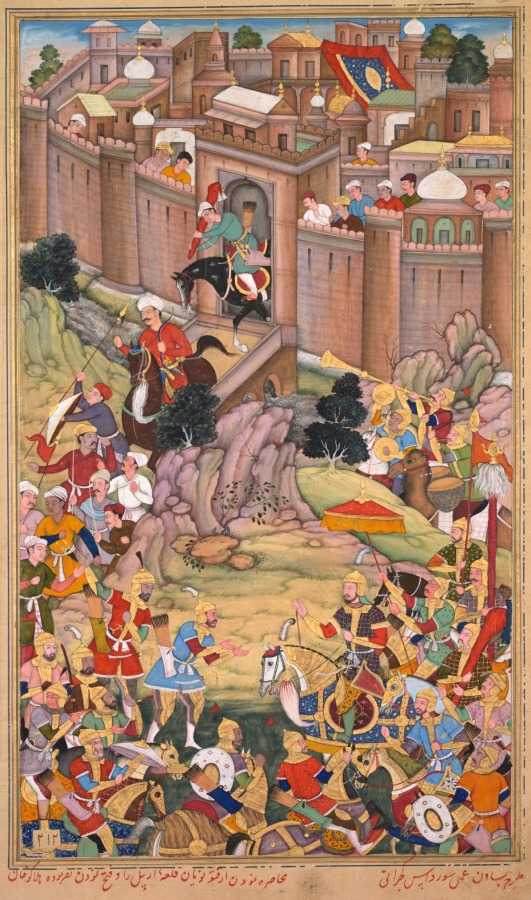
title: The siege of Arbela in the era of Hulagu Khan, from a Chingiz-nama (Book of Chingiz Khan) of the Jami al-tavarikh (Compendium of Chronicles) of Rashid al-Din (Persian, 1247–1318)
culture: Mughal India, court of Akbar (reigned 1556–1605)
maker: Basavana (Indian, active c. 1560–1600)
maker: and Sur Das Gujarati (Indian, active 16th century)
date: c. 1596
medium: Gum tempera, ink, and gold on paper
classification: Painting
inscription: recto lower left: [translated] Siege of the fort of Irbil by Urgatu Nuyan and the attainment of victory by command of Hulagu Khan.; verso overall: [text]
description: A Mongol conqueror riding a white horse gazes stonily at his defeated West Asian opponent in a scene that took place more than 300 years before this painting was made. By the end of the 1500s there was a new emphasis on creating paintings to accompany historical texts. Visually, the diagonal composition with cityscape at the top of the page—also found among the earliest Mughal paintings—was expanded to include throngs of participants and a startling new naturalism. Painting from the Akbar period reached its maturity by the 1590s in works such as this: dynamic in composition and gestures but contained within organized spaces and emphasized three-dimensionality.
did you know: The lord of the citadel in blue is negotiating its surrender to the Mongol general, who rides the white horse in the lower right.